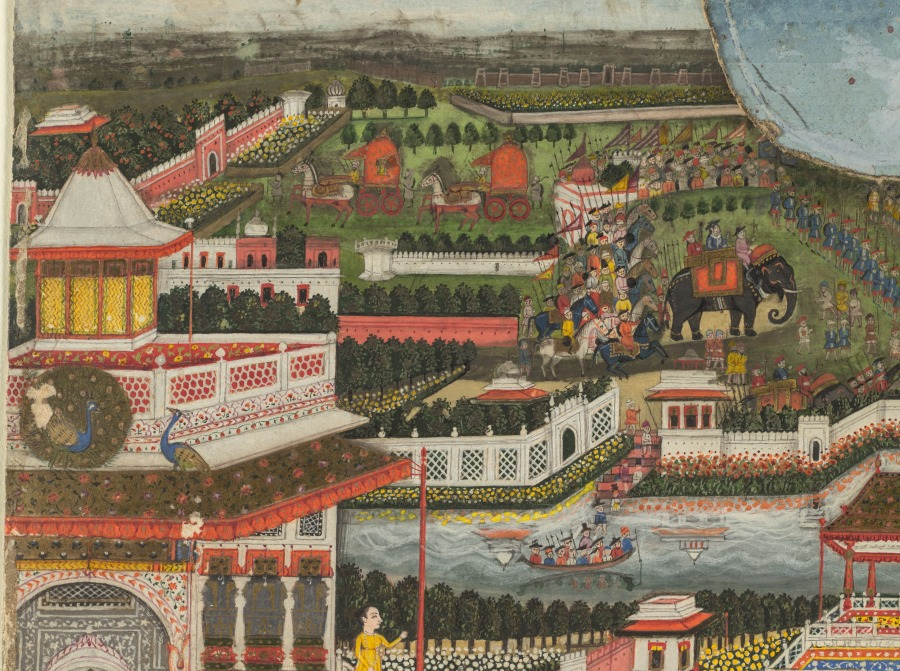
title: Women bathing before an architectural panorama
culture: India, Lucknow, Mughal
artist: Fayzullah (Indian, active c. 1730–1765)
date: c. 1765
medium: Gum tempera and gold on paper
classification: Painting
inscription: Persian inscription in center, on marble balustrade, in nasta‘liq script: The work of Fayzullah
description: Despite the wars waged and forts besieged in the background, life in the palace is carefree and luxurious. Some women enjoy hookahs and music on balconies, while others swim and drink liquor with abandon from Chinese porcelain cups and bottles. The artist has placed his name under the central pavilion, observing the scene across a formal garden of marigolds. The artist seems to have enjoyed experimenting with the idea of perspective, learned from European sources. He created a rapidly receding space that telescopes the view from the intimate harem quarters to the distant battlefields.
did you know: The artist signed his name below the king’s seat that overlooks the garden vista.